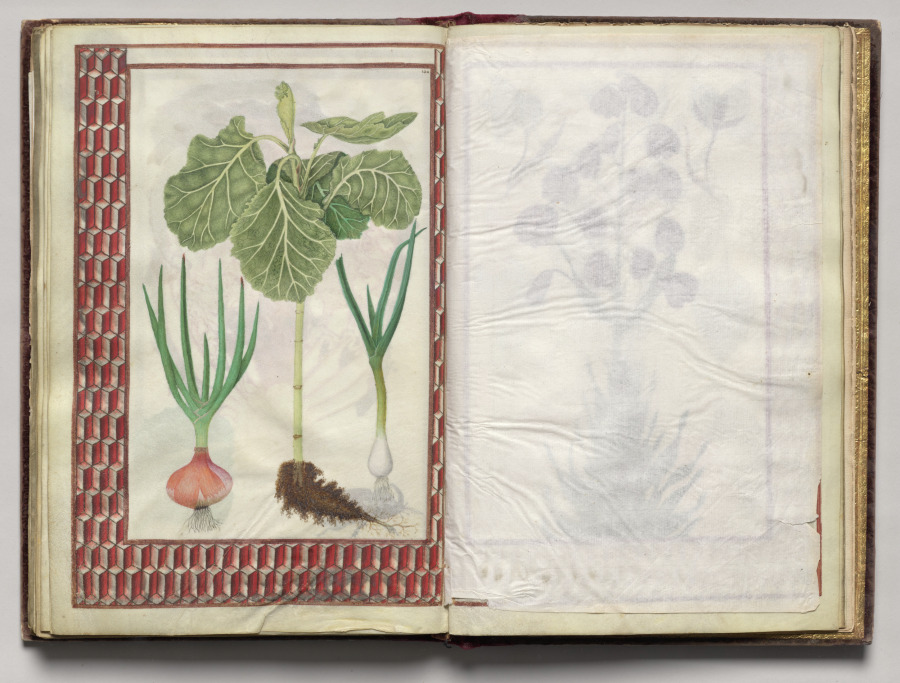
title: Two Onions and a Cabbage with Geometric Border, folio 45 (verso), from Florilegium (A Book of Flower Studies)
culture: France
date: 1608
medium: watercolor, ink, silver, and gold over occasional traces of pencil, on vellum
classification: Bound Volume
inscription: Dated: Poitiers 1608 (on frontispiece) Signed: On frontispiece in black ink, lower right: Van Kuyk Notation on drawing: Frontispiece: in pencil, lower margin: * élève de Van Kessel, peintre flammand (* in pencil also appears in front of Van Kuyk's name).